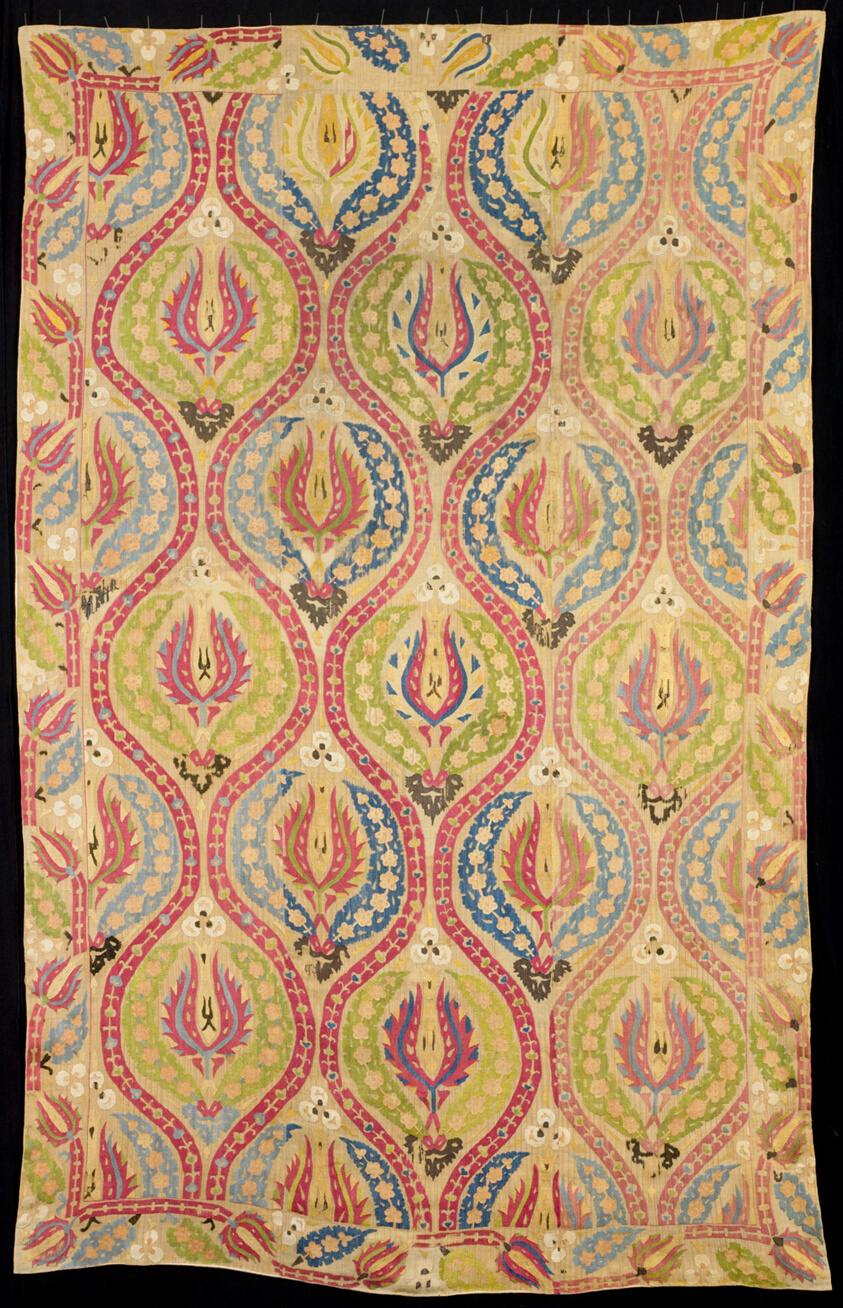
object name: Textile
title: Cover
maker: Turkey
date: 17th century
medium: Linen, plain weave; embroidered with silk in running stitches (twill darning); lined with cotton, plain weave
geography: Turkey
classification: textile; needlework (visual works); weaving